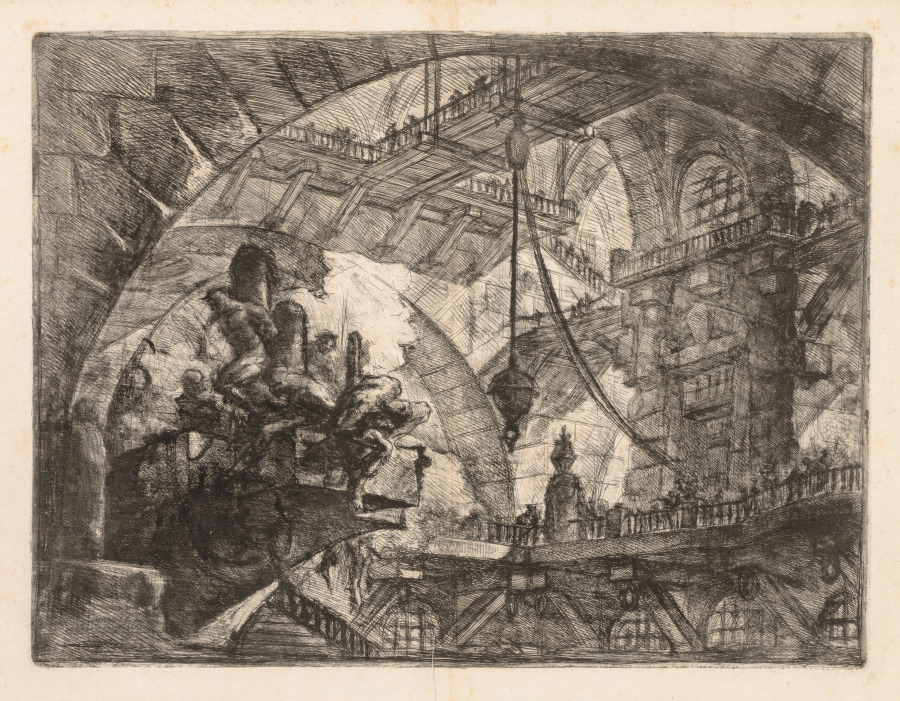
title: Prisoners on a Projecting Platform, Plate 10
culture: Italy, 18th century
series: Imaginary Prisons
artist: Giovanni Battista Piranesi (Italian, 1720–1778)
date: 1749–50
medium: etching, engraving, sulphur tint or open bite, burnishing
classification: Print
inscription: Signed, lower left, in plate: Piranesi f.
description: In his series of imaginary prisons, Giovanni Battista Piranesi experimented with scale, perspective, and etching to create disorienting and disturbing images of incarceration. Based on his training as a stage designer rather than on observations of real prisons, Piranesi used a low vantage point and distant staircases to disrupt traditional perspective and to emphasize both the monumentality of the space and the futility of trying to escape. Set against a strange cloud of white smoke, the densely drawn and deeply etched lines of the prisoners at left produce a confusing jumble of bodies that, while imprecise, evoke their pain and punishment.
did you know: Author Thomas De Quincy compared the disorienting and disturbing imagery of this series to his experience with opium addiction in his 1821 book Confessions of an English Opium-Eater.